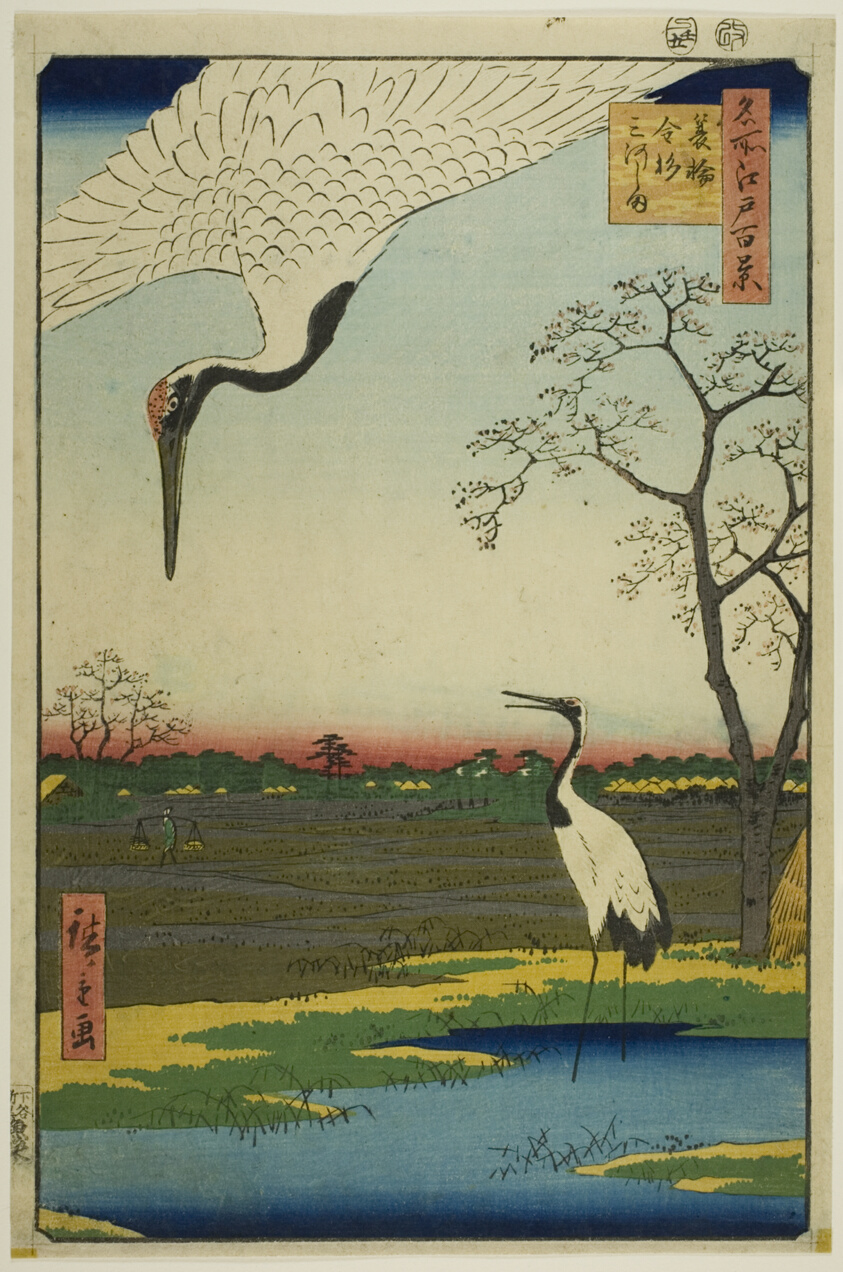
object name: Print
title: Minowa, Kanasugi, Mikawashima, from the series “One Hundred Famous Views of Edo (Meisho Edo hyakkei)”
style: Japanese (culture or style)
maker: Utagawa Hiroshige 歌川 広重; Japanese, 1797–1858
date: 1857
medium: Color woodblock print; oban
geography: Japan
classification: woodblock print; print